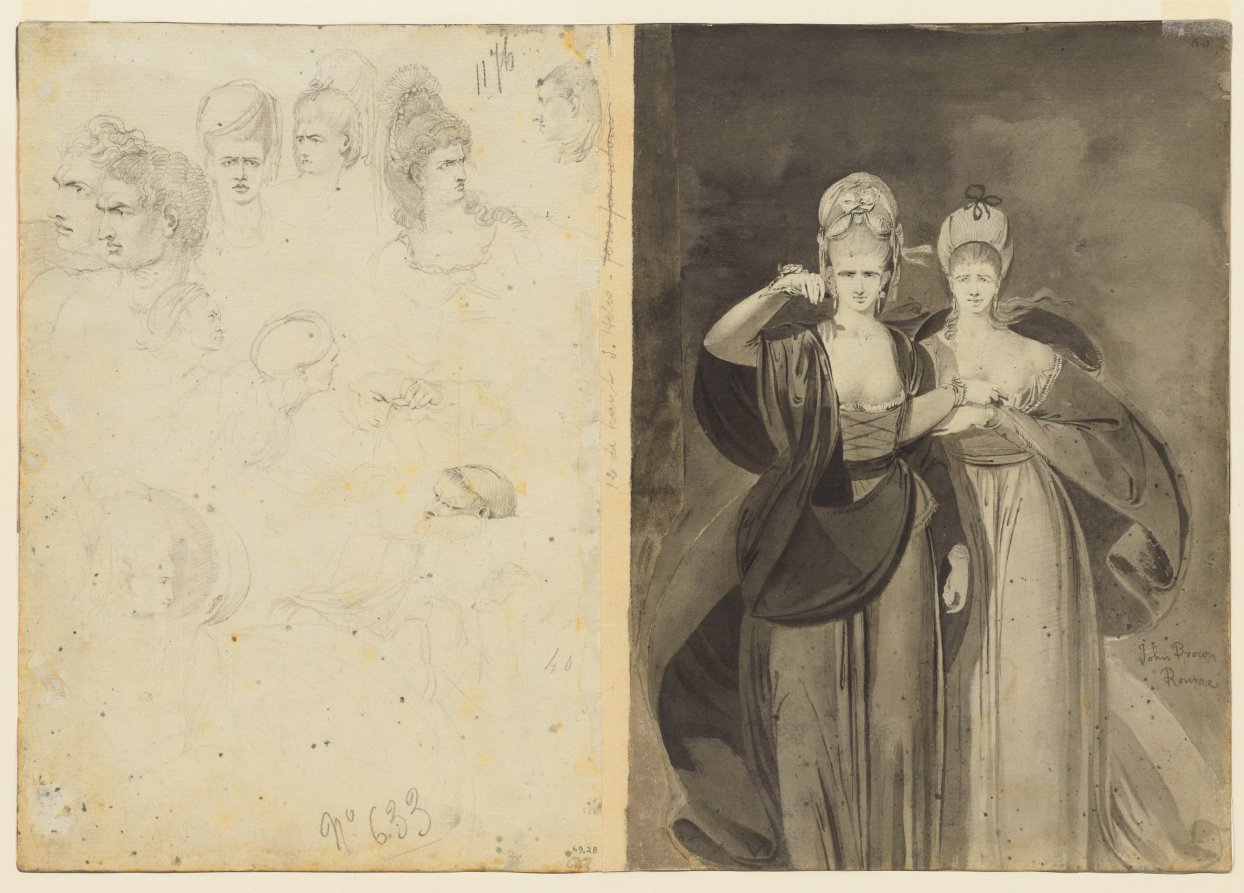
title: Sketches of Heads (verso, left); Two Women (verso, right)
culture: England, 18th century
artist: John Brown (British, 1752–1787)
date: c. 1770–75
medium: left: graphite; right: gray and black wash with point of brush and graphite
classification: Drawing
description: John Brown is known for a small group of monochromatic drawings imbued with sinister overtones. At the age of 20, the Scottish artist traveled to Italy where he spent the next 12 years. This drawing exemplifies his Roman street scenes which often depict women dressed in spectacular, billowing costumes. Here, a figure with bare ankles and plunging décolletage is surrounded by a crowd of men who leer at her. The reverse of the sketchbook sheet includes two independent drawings: a study of faces in fierce and intense expressions, and a pair of women wearing swirling gowns. One figure raises her hand in a mysterious gesture, either beckoning or forewarning the viewer.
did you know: John Brown meant for the dark background of this drawing to evoke the potential danger of Italian nights; the writer Johann Joachim Winckelmann had been murdered in Trieste in 1768, in the most conspicuous example of the period's widespread violence.